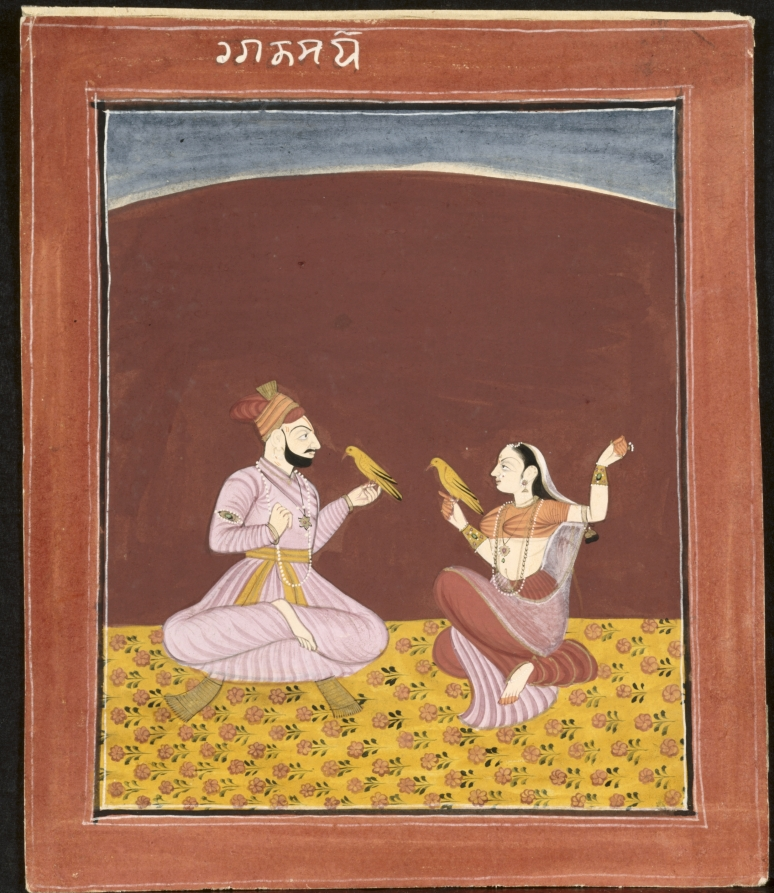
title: Kausa Ragaputra of Malkos, from a Ragamala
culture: Northern India, Pahari kingdoms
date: c. 1750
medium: Gum tempera, ink, and gold on paper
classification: Painting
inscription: raga kamoḍ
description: This specific musical mode is distinguished by a courtly couple sitting together without touching in a domestic space. They each hold a tame bird. Some consider the birds to be of the type used in elite hunting practices. The Pahari region of the northwest Himalayas was famous for its native hunting birds that were prized gifts among the nobility throughout South Asia. The woman is shown with equivalent confidence in handling the bird as her male companion. Although the inscription written in Takri script in the upper margin labels this scene as Kamod Raga of Dipak, the imagery pertains to the Kausa Ragaputra of Malkos.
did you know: This painting was part of a larger manuscript and is the first from the series to enter the CMA's collection.